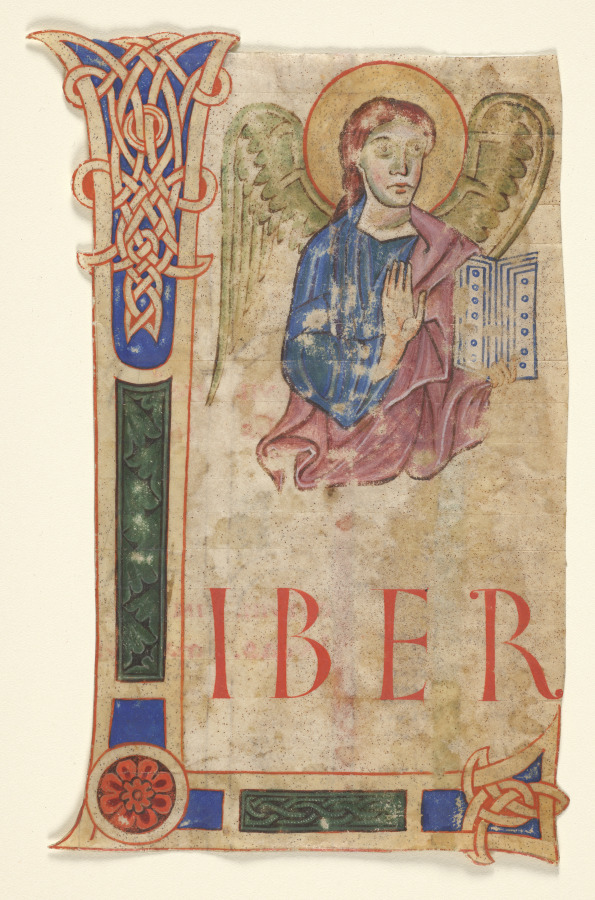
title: Miniature Excised from a Gospel Book with Initial L[iber generationis]: The Symbol of St. Matthew (recto)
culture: Italy, Florence, 12th century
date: c. 1125–1150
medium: ink and tempera on vellum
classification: Manuscript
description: This initial L, for Liber generationis... (The book of the generation of Jesus Christ...), originally served as an introduction to the Gospel of St. Matthew. Unlike the Helmarshausen illuminator, who painted an actual portrait bust of St. Matthew (displayed nearby), this artist chose to paint within the letter the Evangelist's symbol, a winged man holding a book.